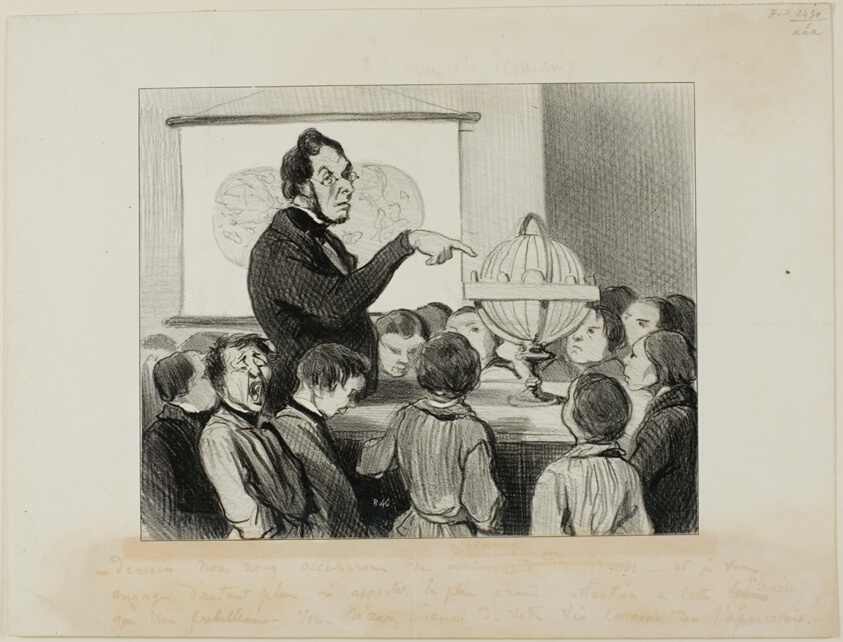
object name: Print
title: "- Tomorrow we will study Saturn. I want you to pay special attention to this great planet.... which in all likelihood you will never in your life have the opportunity to see!," plate 18 from Professeurs Et Moutards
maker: Honoré Victorin Daumier; French, 1808-1879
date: 1846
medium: Lithograph in black on white wove paper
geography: France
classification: lithograph; print; prints and drawing